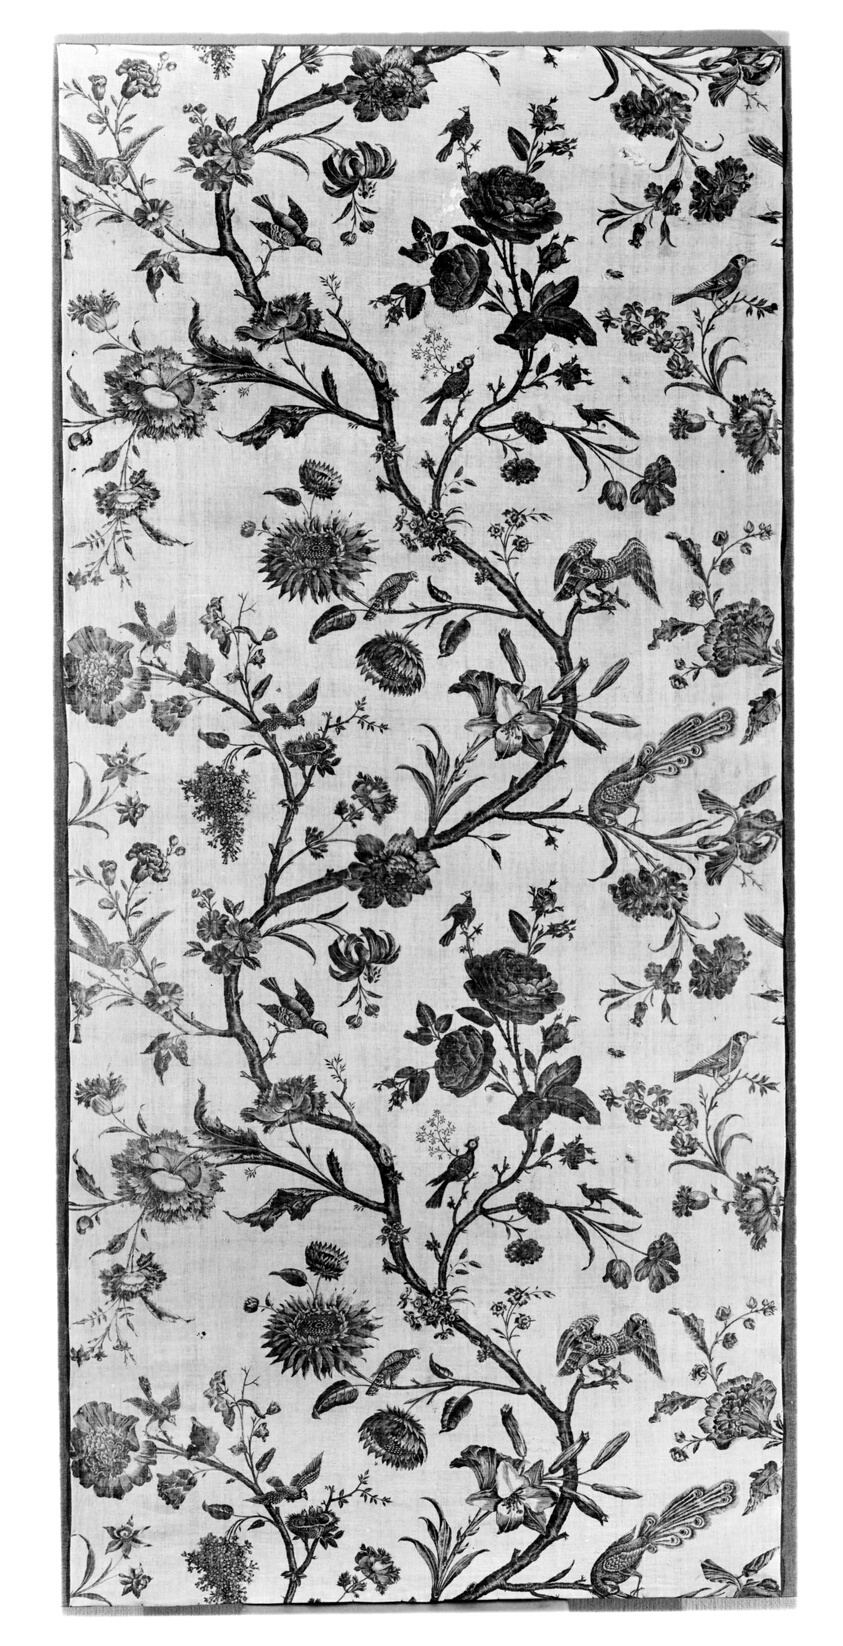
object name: Textile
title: Panel (Furnishing Fabric)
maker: France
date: 1780/1800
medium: Cotton, plain weave; quilted; block printed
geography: France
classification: textile; weaving - printed; furnishing textile